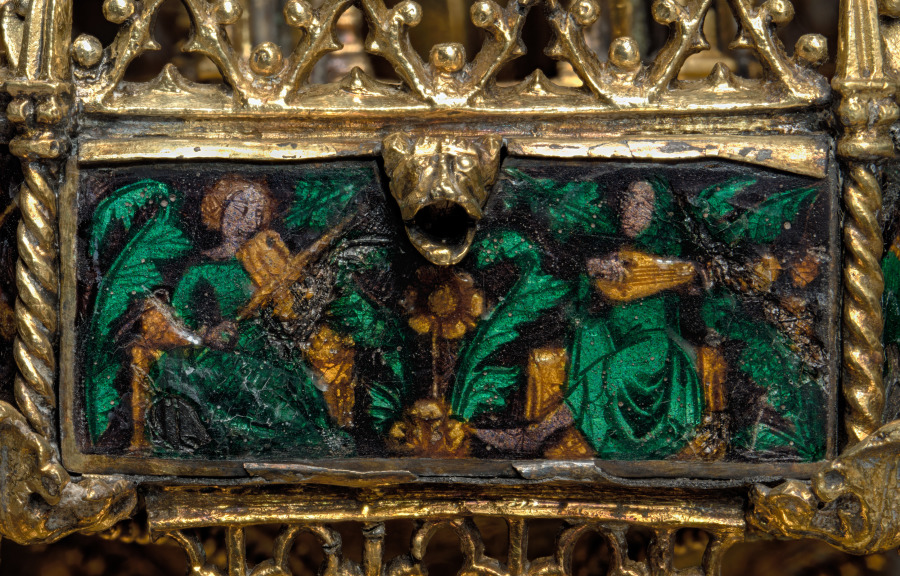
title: Table Fountain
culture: France, Paris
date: c. 1320–40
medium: gilt-silver and translucent enamels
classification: Metalwork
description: Conceptually and stylistically, this object is beyond all else a piece of Gothic architecture in miniature with vaults, pinnacles, columns, and traceried arches. Though the artist who created it is unknown, he was unquestionably inspired by the great Gothic buildings of his time. The table fountain is a three-tiered assembly combining cast elements with bent sheets of gilt-silver. To these have been attached a series of enamel plaques representing grotesque figures, some of which play musical instruments. Water wheels and bells were added to capture motion and sound. The rich detail, precious materials, and involved ornamentation of this deluxe object suggest it would have been expensive to produce and highly treasured by its original owner, someone of high status, and would have been deployed as an object of spectacle. This is the most complete example of its type known to survive from the Middle Ages. Medieval inventories reveal that small fountains like this, often taking various forms, and generally made from precious metals, once existed in large numbers, thus making the Cleveland table fountain an extremely rare object.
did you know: This fountain with its minute architectural details and finely made enamel plaques displayed the wealth and refinement of the owner as it entertained his guests. Imagine hearing the ringing of the tiny bells when this fountain was in use.